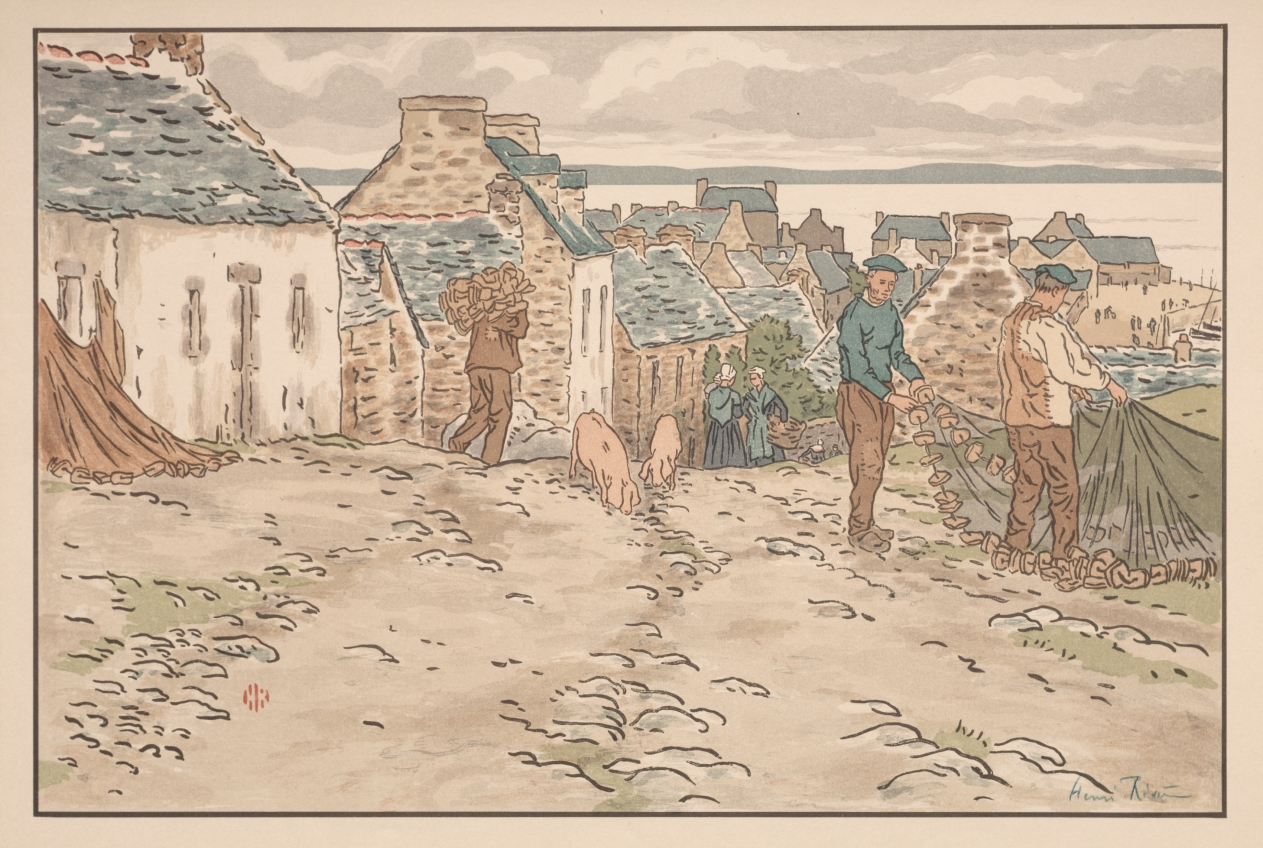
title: The Beautiful Countryside in Brittany: Street in Tréboul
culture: France, 19th century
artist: Henri Rivière (French, 1864–1951)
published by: Printed by Eugene Verneau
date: 1898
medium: color lithograph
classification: Print